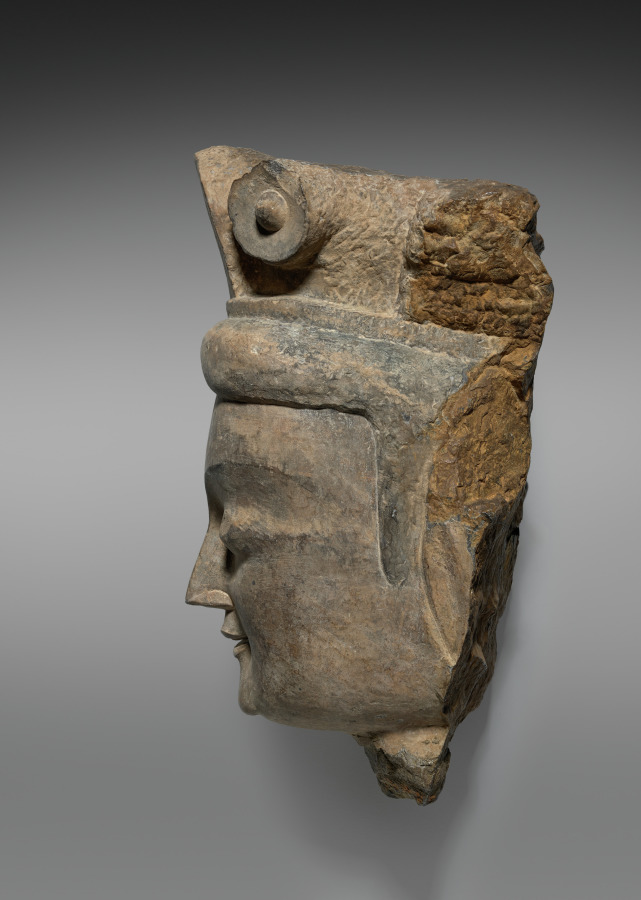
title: Head of Bodhisattva Guanyin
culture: China, Six Dynasties period (317-581), Northern Wei dynasty (386-534)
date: c. 510–520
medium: stone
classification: Sculpture